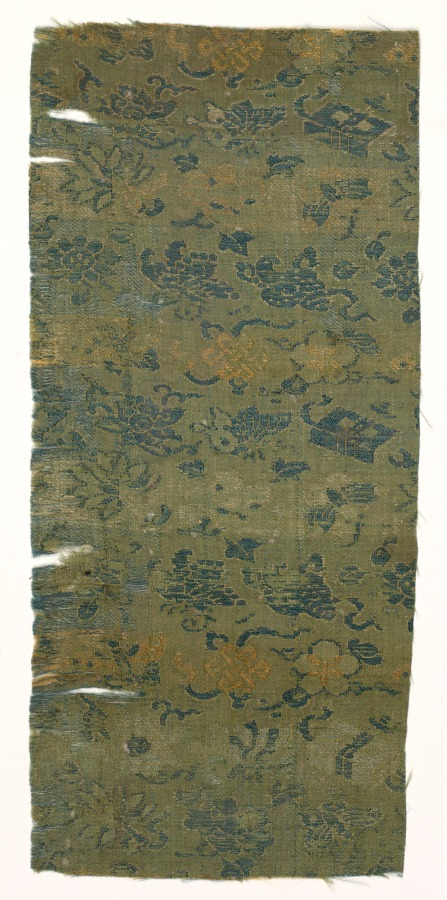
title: Fragment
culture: China, 18th century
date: 1700s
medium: silk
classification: Textile